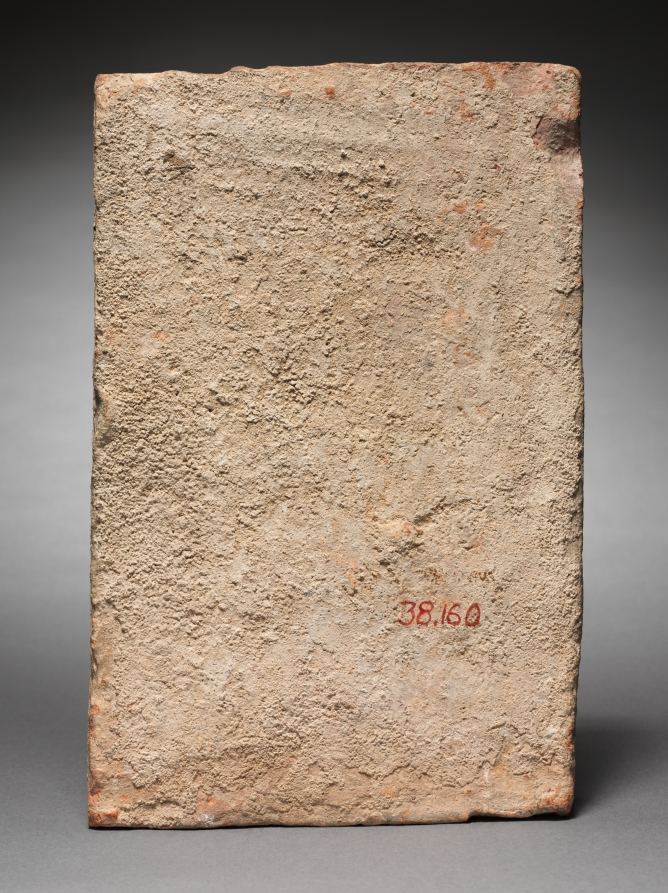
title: Columbarium Tomb Plaque with the Monogram of Christ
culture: Spain (Visigothic or Byzantine)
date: 400–800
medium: terracotta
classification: Sculpture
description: This thick clay plaque covered a burial niche that contained the remains of the deceased in a simple communal tomb complex called a columbarium. The chi-rho monogram of Christ identifies the deceased as a Christian. The monogram was seen as representing Christ’s victory over death, while the letters that flank it, alpha and omega, the first and last letters of the Greek alphabet, symbolize Christ as the beginning and end of all things.